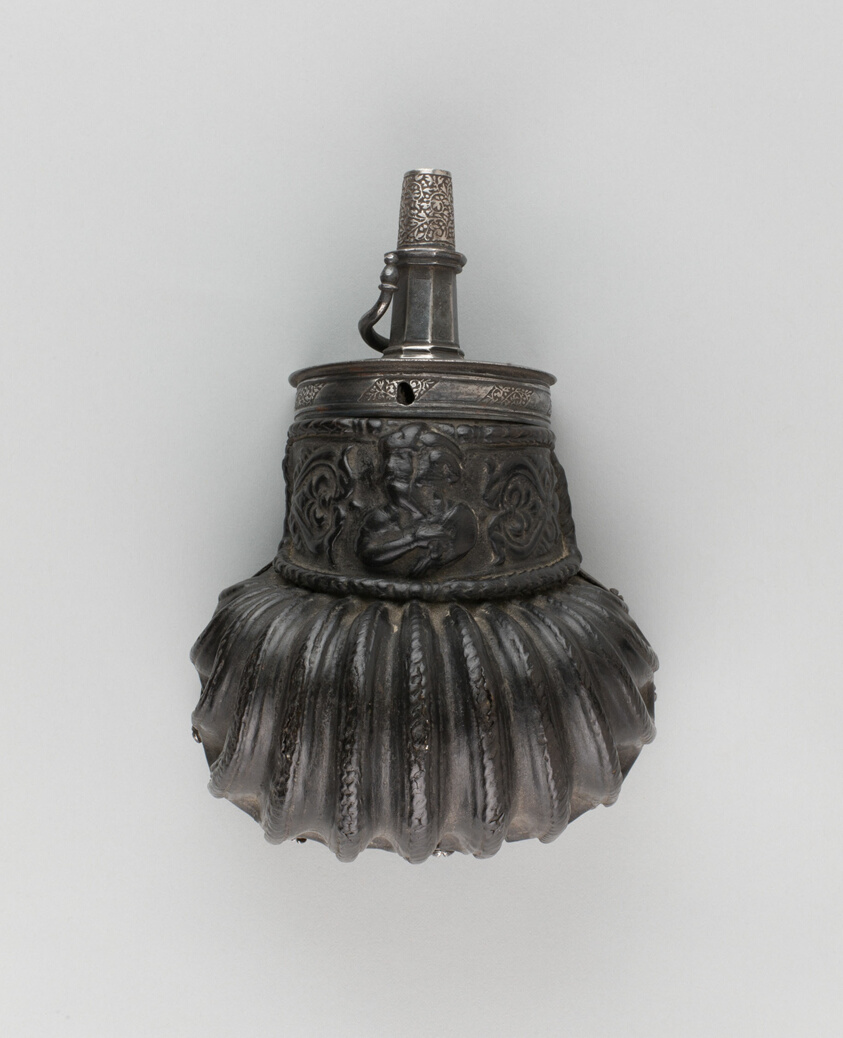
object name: Arms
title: Powder Flask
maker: Italian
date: 1570/80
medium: Steel, iron, silver, wood, and leather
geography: Italy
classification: firearm-accessory; arms; arms and armor